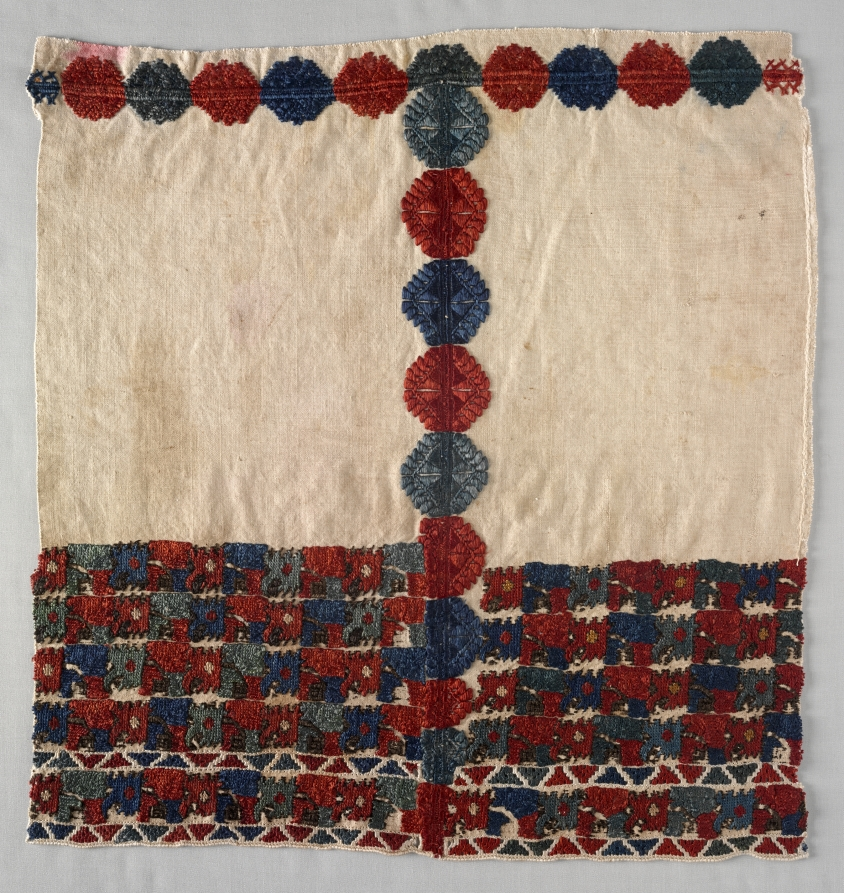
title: Sleeve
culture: Greece, Dodecanese Islands, 18th century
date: 1700s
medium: embroidery: silk on cotton tabby ground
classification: Embroidery